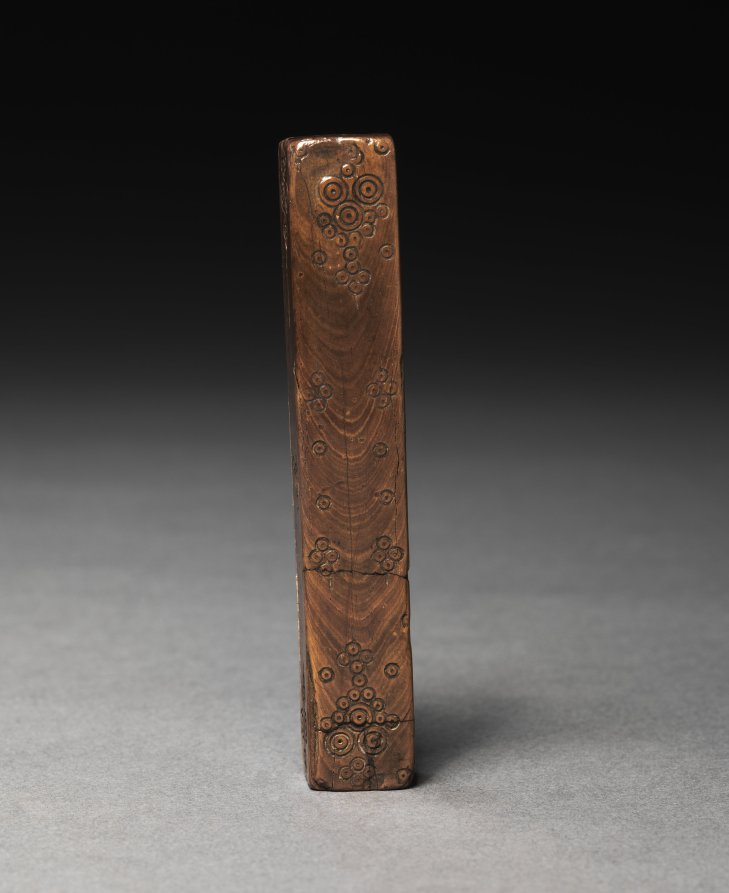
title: Talus or Die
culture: Egypt, Greco-Roman period (332 BCE–395 CE), Roman empire (30 BCE–395 CE)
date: 30 BCE–395 CE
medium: ivory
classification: Implements